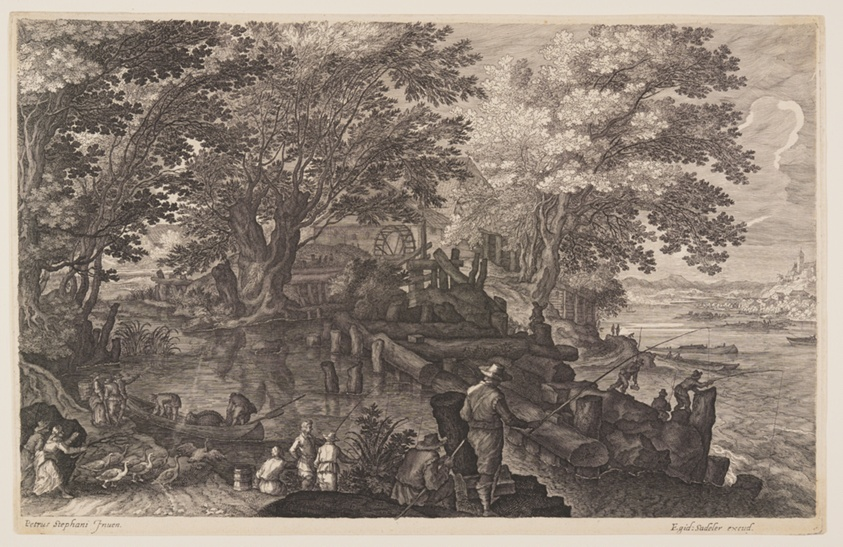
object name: Print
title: Scene One: Watermill on an Island in a River with Men Fishing, from Eight Scenes from Bohemia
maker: Aegidius Sadeler II (Flemish, c. 1570–1629); after Pieter Stevens (Flemish, 1567-after 1624)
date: 1610/20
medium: Engraving on ivory laid paper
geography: Flanders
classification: print; paper; prints and drawing; engraving